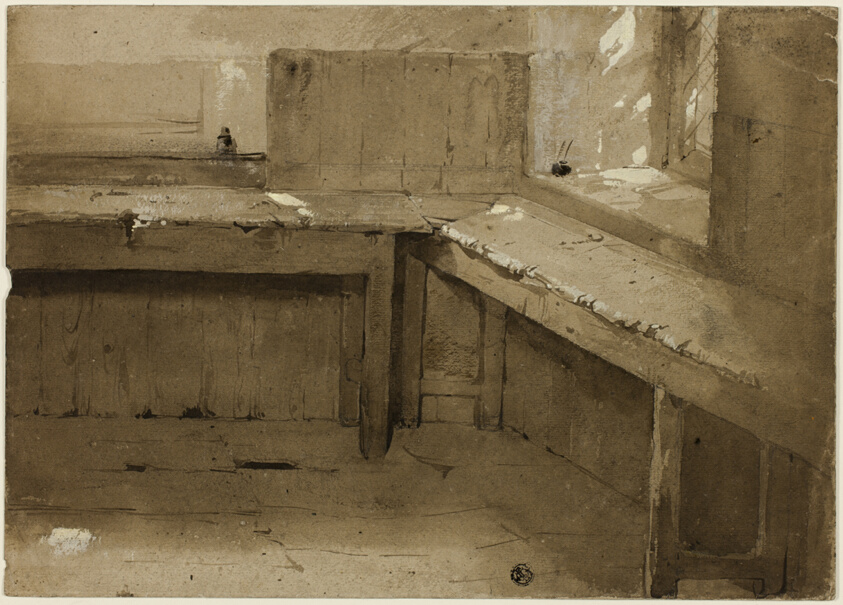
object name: Drawing and Watercolor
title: Background Study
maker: Attributed to Sir David Wilkie; Scottish, 1785–1841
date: 1840/50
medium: Brush and brown wash heightened with white gouache over graphite, on tan wove paper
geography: Scotland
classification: ink or chalk wash; drawings (visual works); prints and drawing